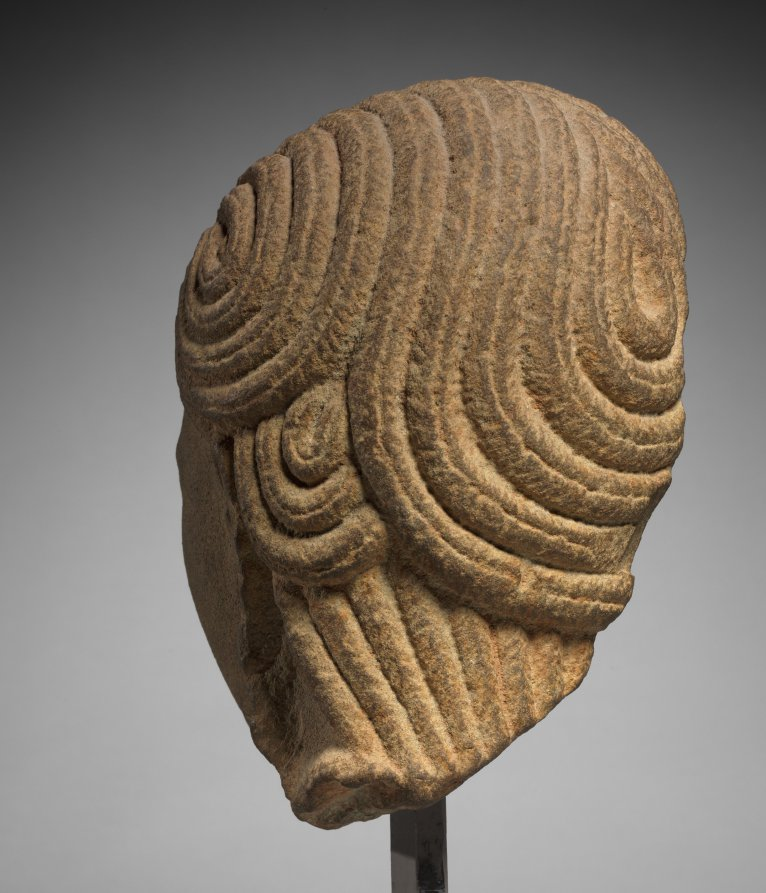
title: Head of Male Deity, possibly Aiyanar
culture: Central Thailand, Phetchabun province, possibly Si Thep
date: 600–650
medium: sandstone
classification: Sculpture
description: The dreadlocks suggest that this figure is related to the Hindu god Shiva, and the sensitive rendering of the facial features indicates that it was carved during the early phase of stone sculpture production in Thailand. A more complete sculpture of another male figure with dreadlocks and youthful features is known from Thailand and shows him seated with one knee up, supported by a yoga strap. In South India, a deity of this description is worshiped as a guardian on the outskirts of villages on the banks of ponds and reservoirs, known as Aiyanar, which means "Lord" in the Tamil language. Alternatively, this figure could be an ascetic, or follower of Shiva.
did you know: This figure may depict a deity who protects travelers on their way.